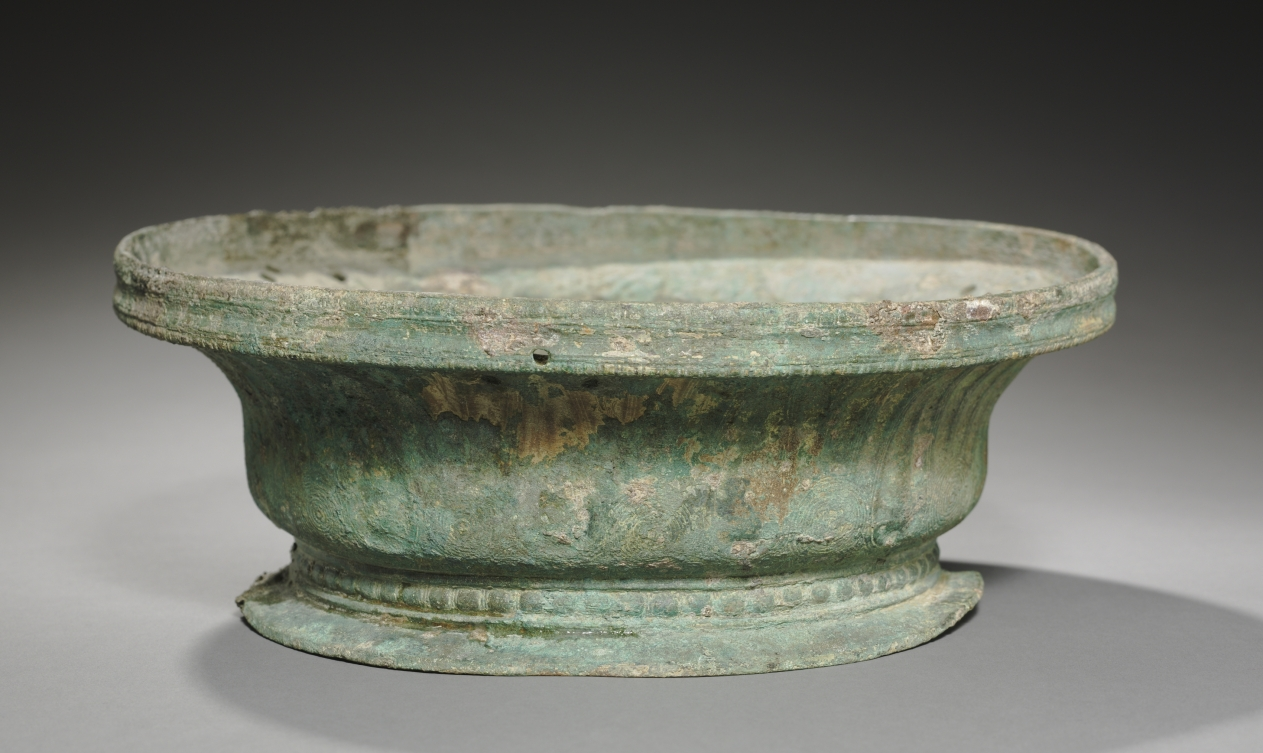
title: Bronze Volute Krater Base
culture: Greece, Laconia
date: late 600s BCE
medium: bronze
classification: Metalwork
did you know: This object supported a large vessel used for mixing wine with water called a krater.